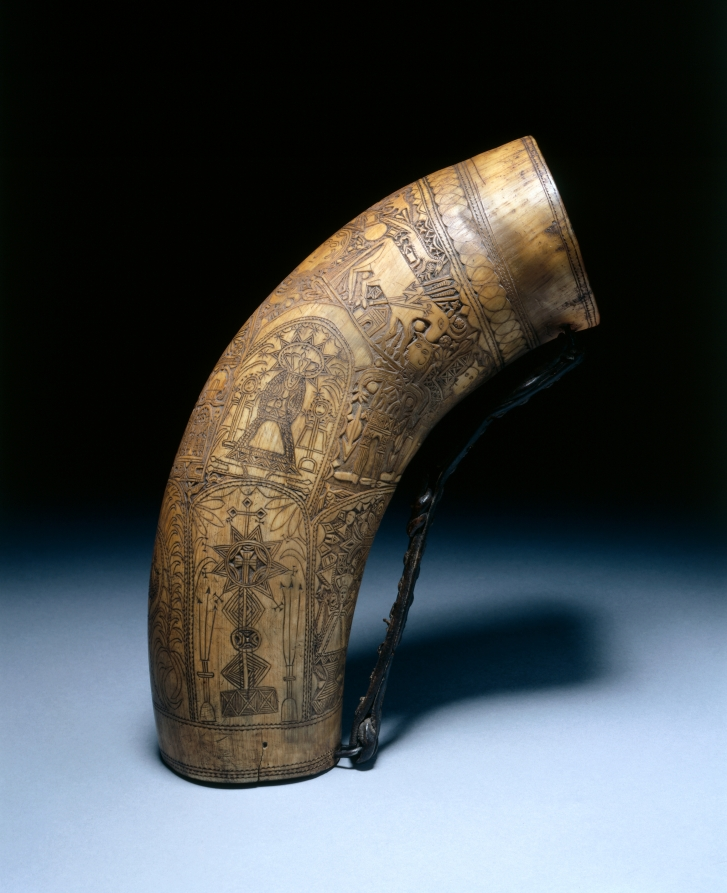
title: Powder Flask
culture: Spain, late 18th-early 19th century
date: late 1700s–early 1800s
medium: cowhorn, incised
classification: Arms and Armor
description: Powder flasks are small, portable containers designed to hold gunpowder. From the 1400s to the 1800s, powder flasks were indispensable for charging and priming firearms of all types. Without powder flasks firearms were of little use to their owners. Many highly decorated flasks rank as works of art.